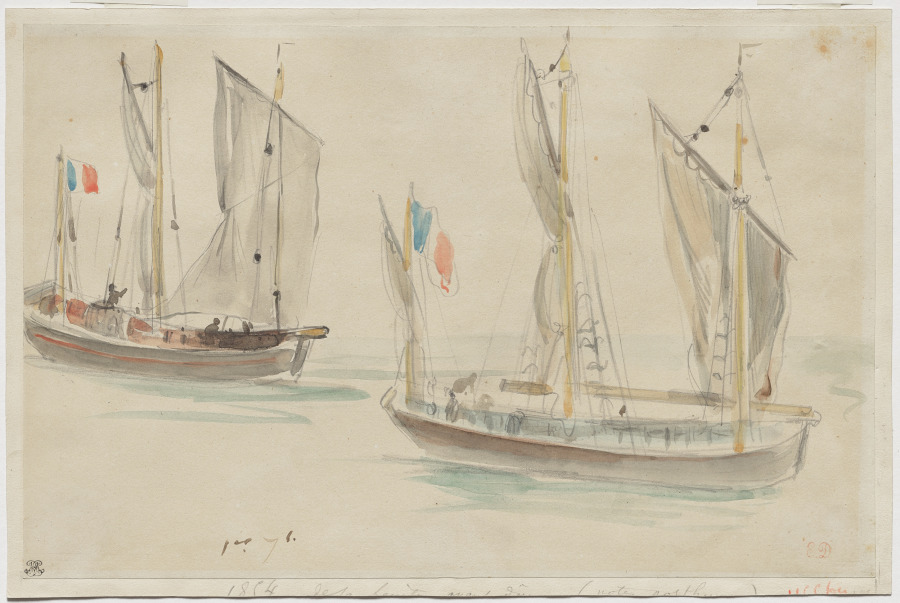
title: Two Boats at the Harbor of Dieppe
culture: France, 19th century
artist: Eugène Delacroix (French, 1798–1863)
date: 1854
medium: watercolor and pencil on paper laid down on board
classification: Drawing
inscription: inscribed, at bottom center, in brown ink: 1er 7b [septembre]; inscribed along lower margin of board, in pencil: 1854 [illeg.]; at lower left, in black ink: stamp of Marcel Louis Guérin [1873-1948; Lugt 1872b]; at lower right, in red ink: Delacroix studio stamp [Lugt 838a]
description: In this late drawing, Eugène Delacroix used spare layers of watercolor to record two large boats floating in a harbor, contrasting the bright tones of the French flags flying on both with the subdued hues of the water surrounding them. The artist recorded the scene during one of five stays in Dieppe, a coastal town that became a popular vacation destination after it was connected to Paris by train in 1848. Delacroix was passionate about depicting the sea and its environs and created numerous variations of this subject over the course of about a decade.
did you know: Eugène Delacroix described making this drawing in his journal, writing on September 1, 1854: “Drew from my window, before dinner, some boats.”